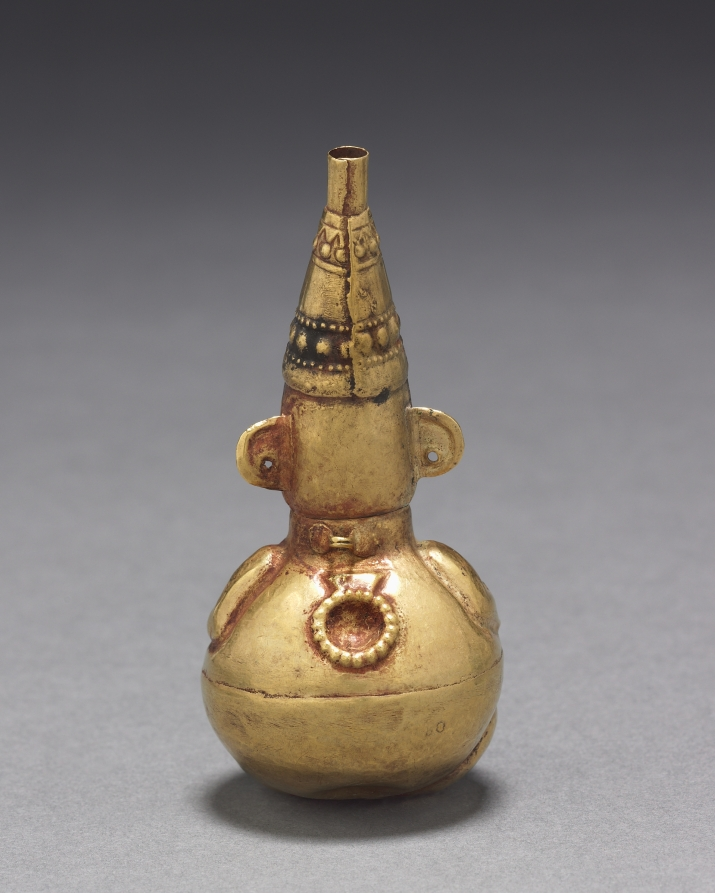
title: Figural Flask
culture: Peru, North Coast, Lambayeque Valley, Sicán or Chimú, 9th-15th Century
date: c. 800–1470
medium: hammered and embossed gold alloy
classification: Metalwork